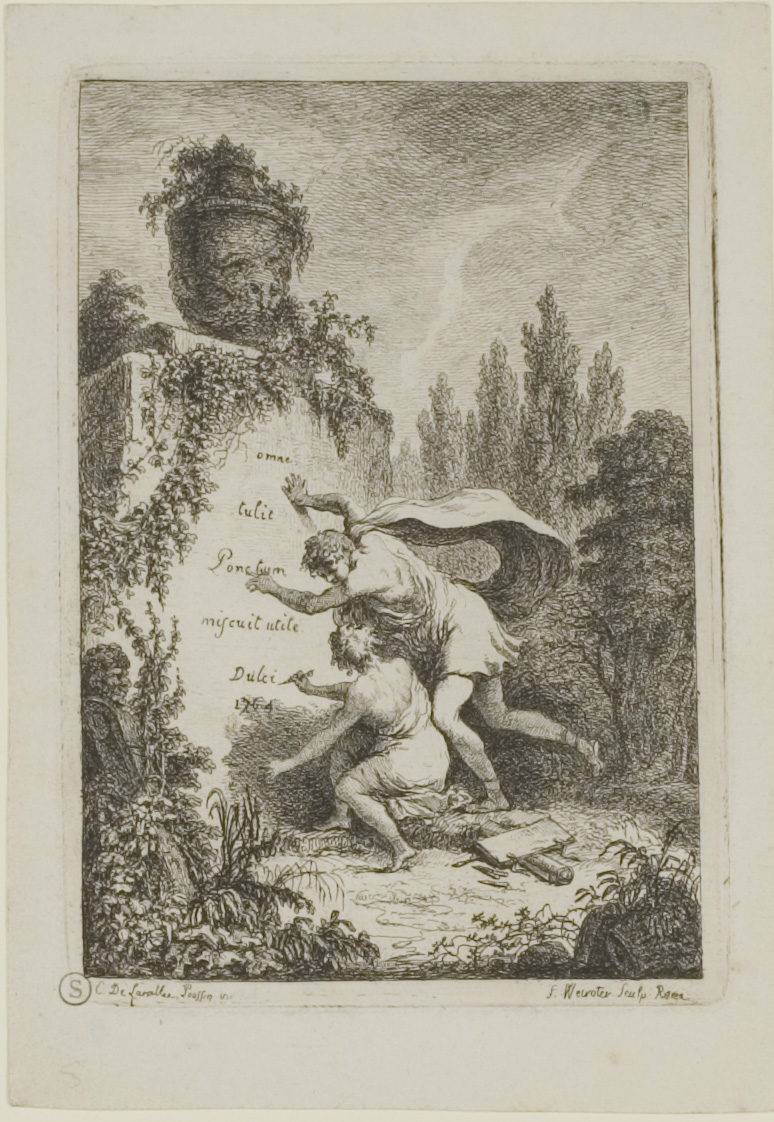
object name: Print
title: Plate from, Nella Venuta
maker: Franz Edmund Weirotter (Austrian, 1730–1771); after Etienne de Lavallée-Poussin (French, 1735–1802)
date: 1764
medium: Etching in black on ivory laid paper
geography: France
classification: etching; paper; print; prints and drawing